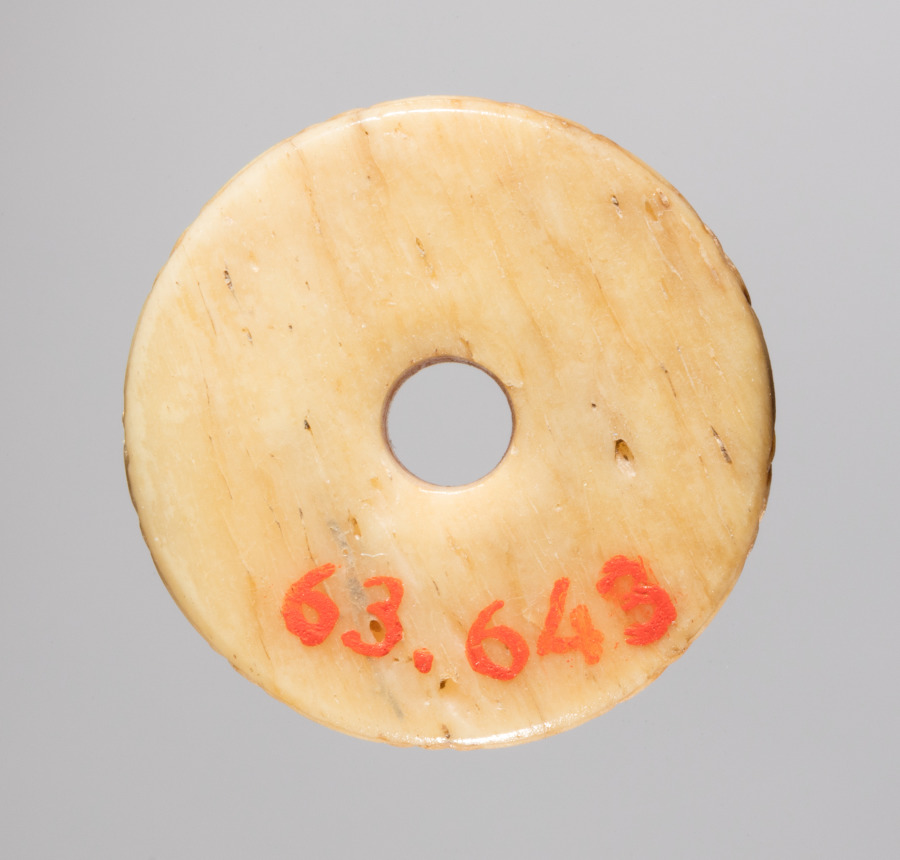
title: Spindle Whorl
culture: Iran, early Islamic period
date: 700s - 900s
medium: bone, incised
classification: Spindle Whorl